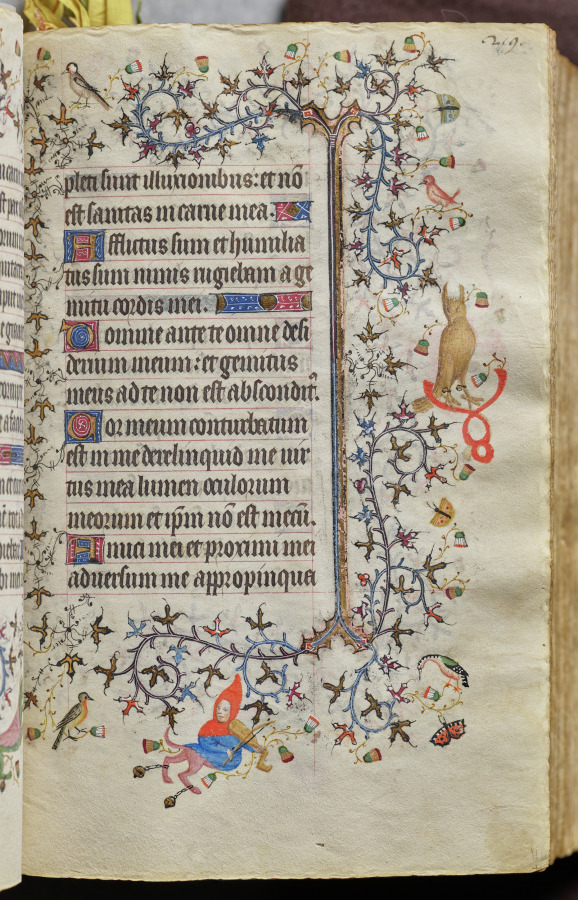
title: Hours of Charles the Noble, King of Navarre (1361-1425): fol. 110r, Text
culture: France, Paris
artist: Master of the Brussels Initials and Associates (French)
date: c. 1405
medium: ink, tempera, and gold on vellum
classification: Bound Volume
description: This precious volume was obviously highly prized by its owner, the French-born King of Navarre, who had his coat of arms painted on no less than twenty folios. Rather than directly commissioning this manuscript from a specific workshop, it seems that Charles the Noble acquired his book of hours -- perhaps ready-made for the luxury market -- while on a trip to Paris in 1404-05. A collaborative effort, six painting styles are evidenced within the pages of this codex, those of two Italians, two Frenchmen, and two Netherlanders. The painter who was responsible for the planning and decoration of the book, and who produced seventeen of the large miniatures, was a Bolognese artist known as the Master of the Brussels Initials. His principal assistant, responsible for most of the borders, was a Florentine who signed his name "Zecho" da Firenze on folio 208 verso.